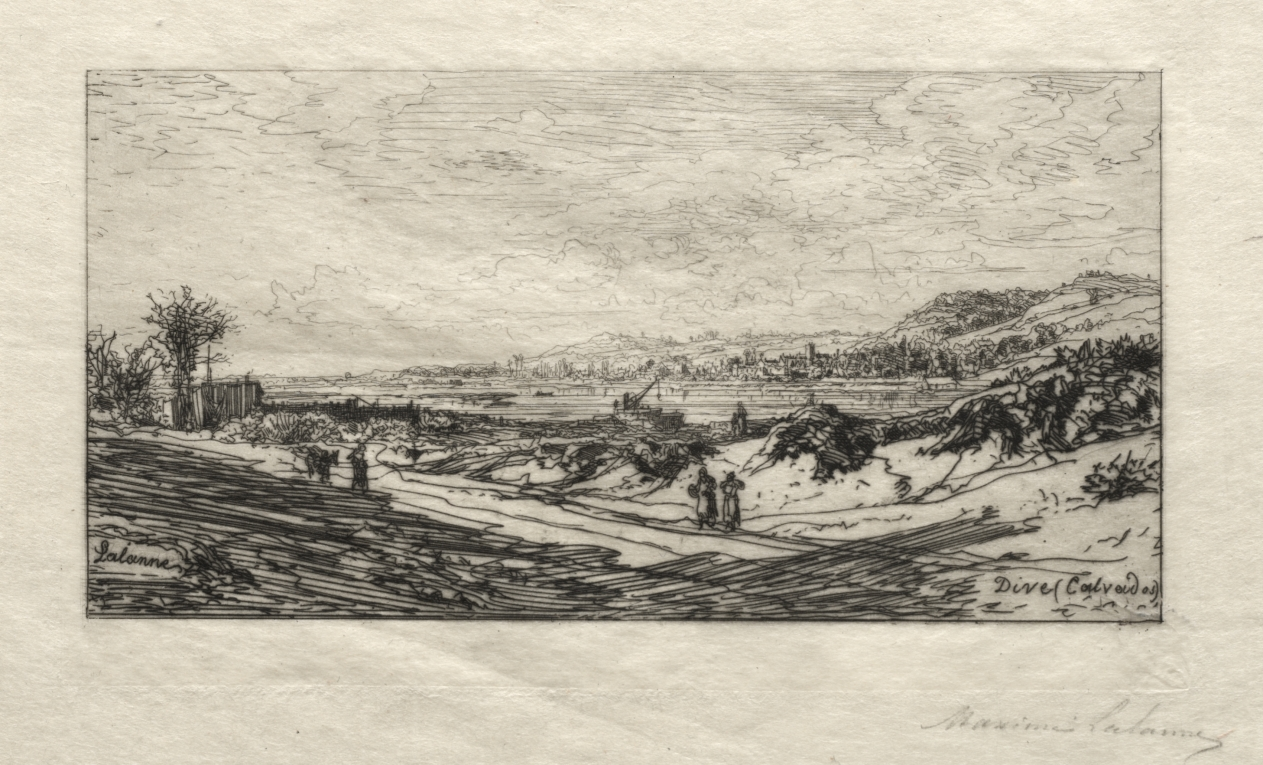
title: Dives (Calvados)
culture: France, 19th century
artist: Maxime Lalanne (French, 1827–1886)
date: 1869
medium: etching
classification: Print